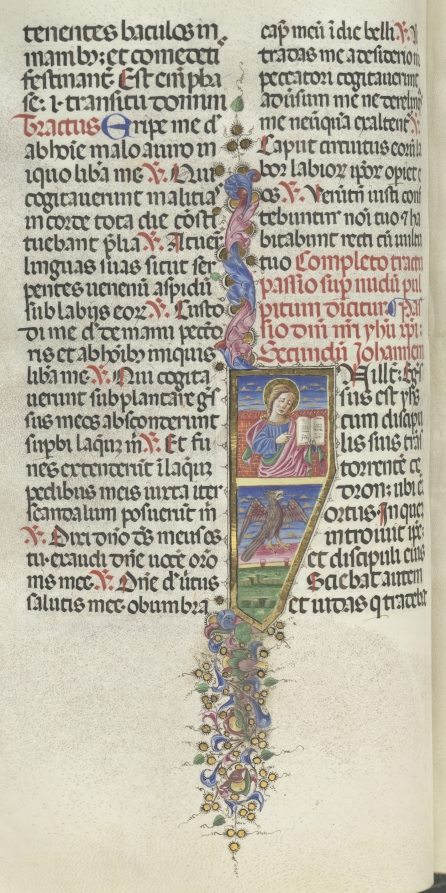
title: Missale: Fol. 141v: Saint John with Eagle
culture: Italy, Perugia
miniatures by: Bartolommeo Caporali (Italian, c. 1420–1503)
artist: assisted by Giapeco Caporali (Italian, d. 1478)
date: 1469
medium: ink, tempera and burnished gold on vellum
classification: Bound Volume